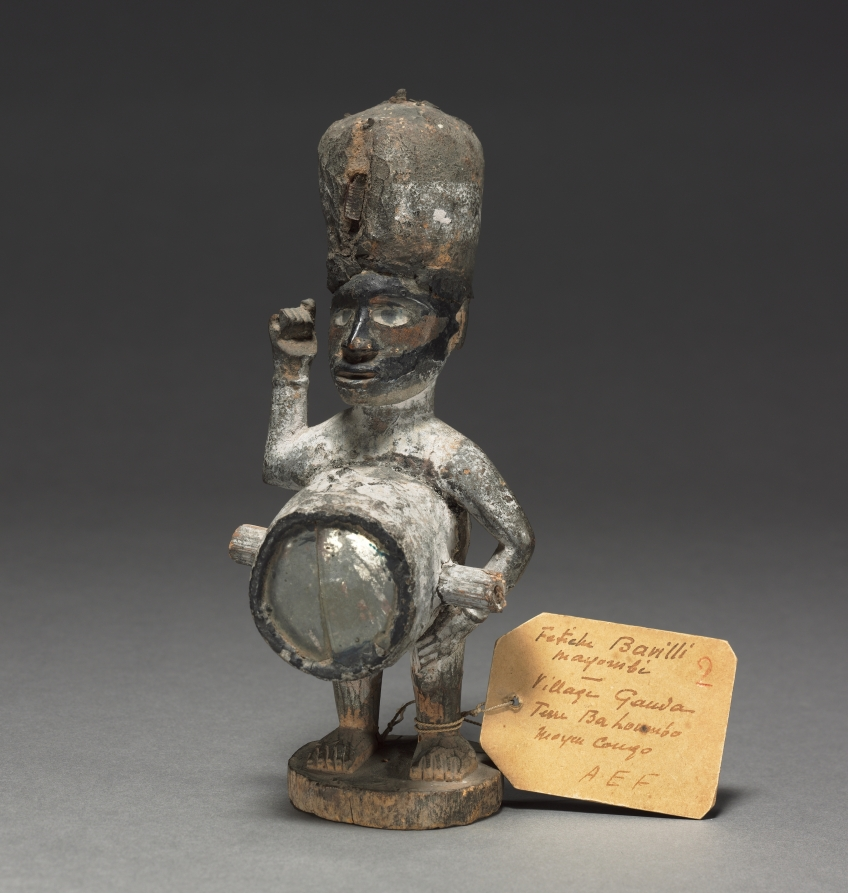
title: Power figure (nkisi)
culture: Central Africa, Republic of the Congo, Kongo people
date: late 1800s-early 1900s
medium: Wood, organic materials (including resin), probably kaolin, and metalized glass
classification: Sculpture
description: This figure is of the nduda type, characterized by the attached "guns" loaded with gunpowder and used to shoot witches. It is the only figure that adopts the threatening pose: the right hand raised, holding a spear or knife, and the left hand resting on the hip. Two guns protrude horizontally on both sides of the cylindrical medicine pack on the belly, covered with a round piece of mirror.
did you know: This is the only figure in a group of seven found in a French antique shop adopting a threatening pose.